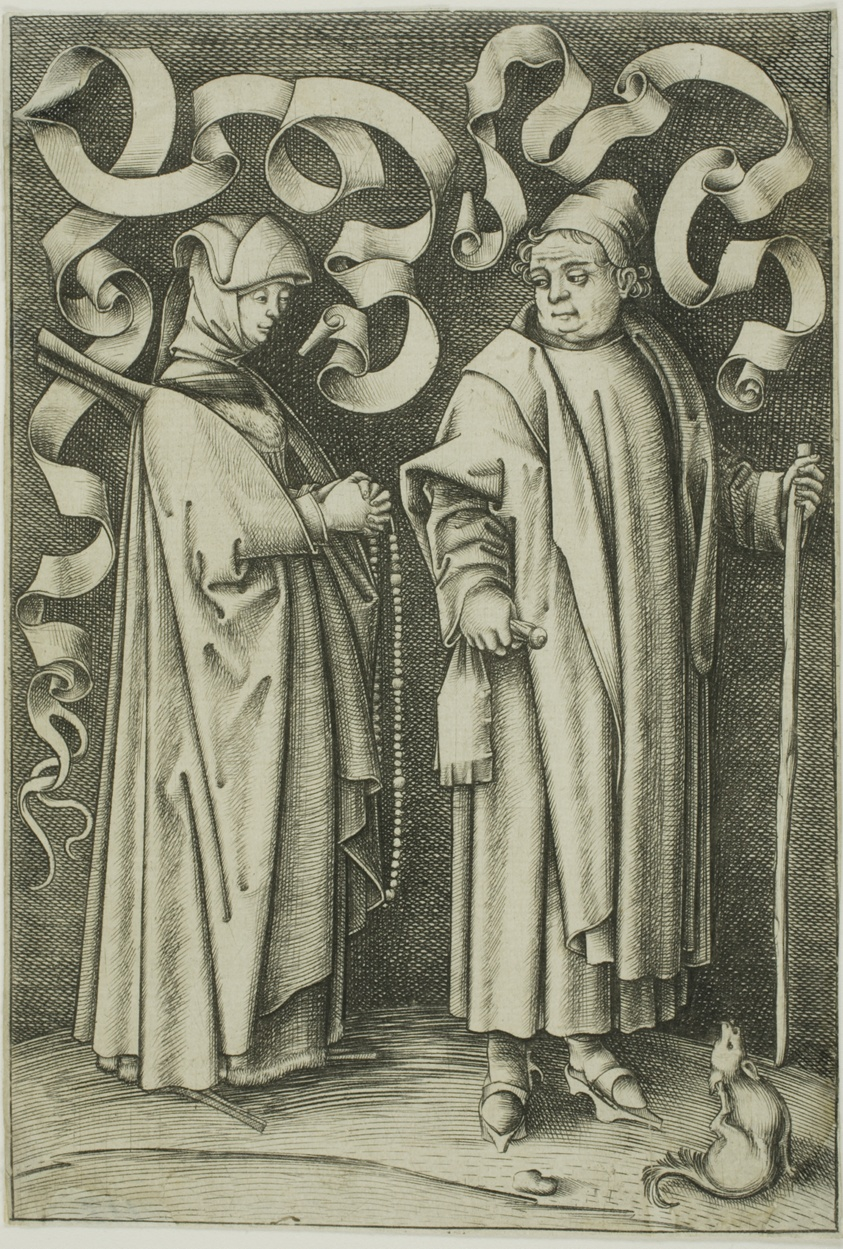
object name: Print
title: The Churchgoers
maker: Israhel van Meckenem the Younger; German, c. 1440/45-1503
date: c. 1495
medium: Engraving on ivory laid paper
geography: Germany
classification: engraving; print; prints and drawing